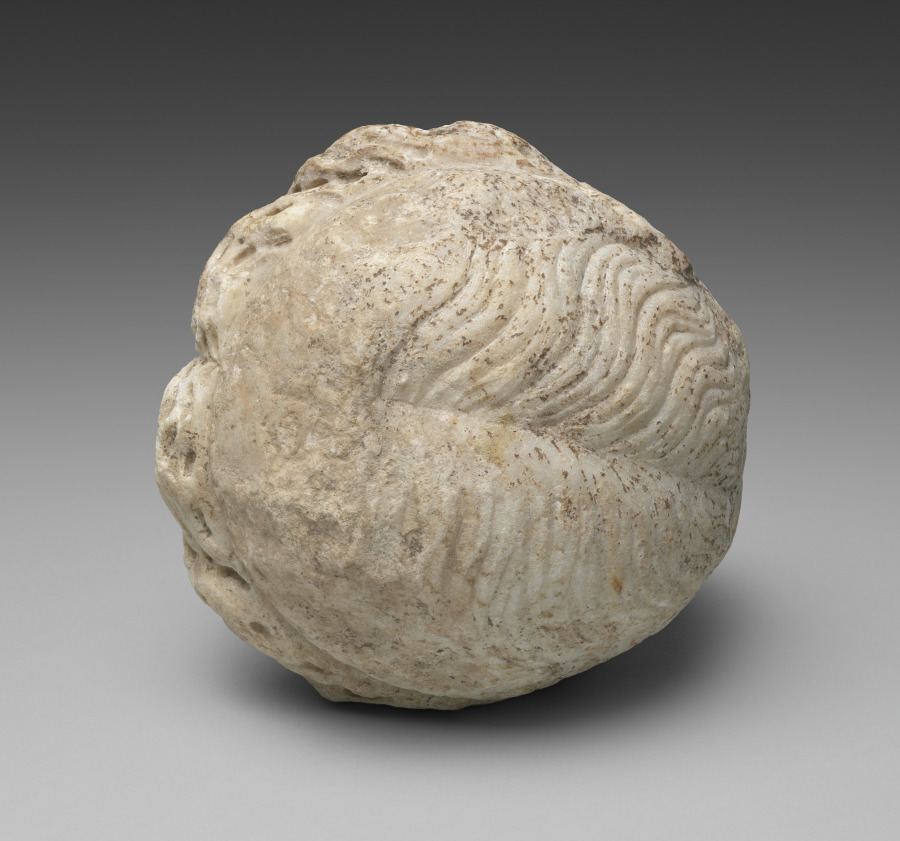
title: Head of Apollo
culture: Roman, Imperial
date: 1–200 CE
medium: marble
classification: Sculpture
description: This marble head, about three-quarter life-sized with idealized features, likely represents Apollo, the god most renowned for his youthful beauty. The hair spreads from a central part, flowing to either side in long and deeply drilled locks that cover the ears. An incised line separates these locks from a rougher area above, probably reserved for a separately made diadem or wreath, likely of metal.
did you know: This head of Apollo has also been identified as female, perhaps a Muse or other goddess.